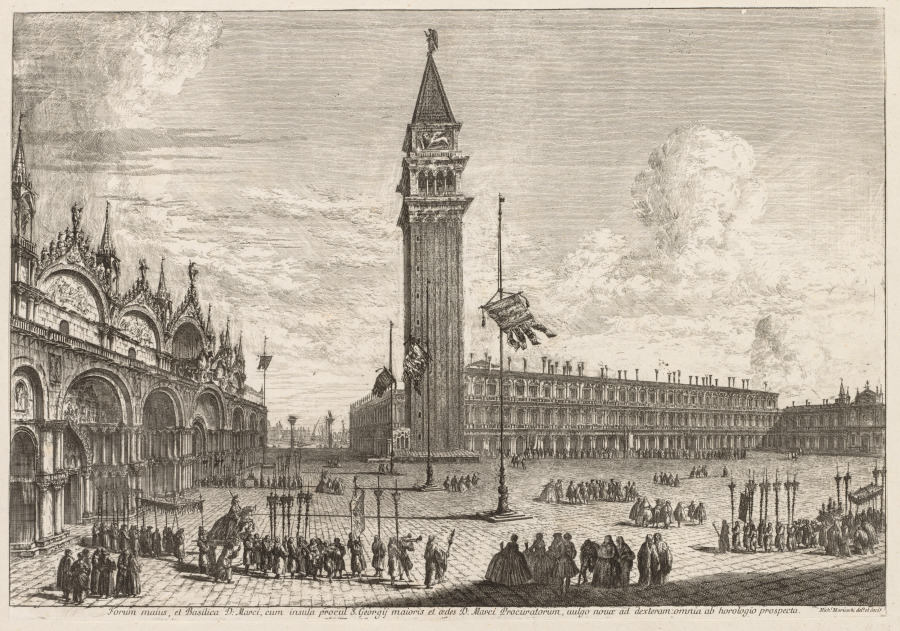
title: Views of Venice: Piazza and Piazzetta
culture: Italy, 18th century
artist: Michele Marieschi (Italian, 1710–1743)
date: 1741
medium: etching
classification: Print